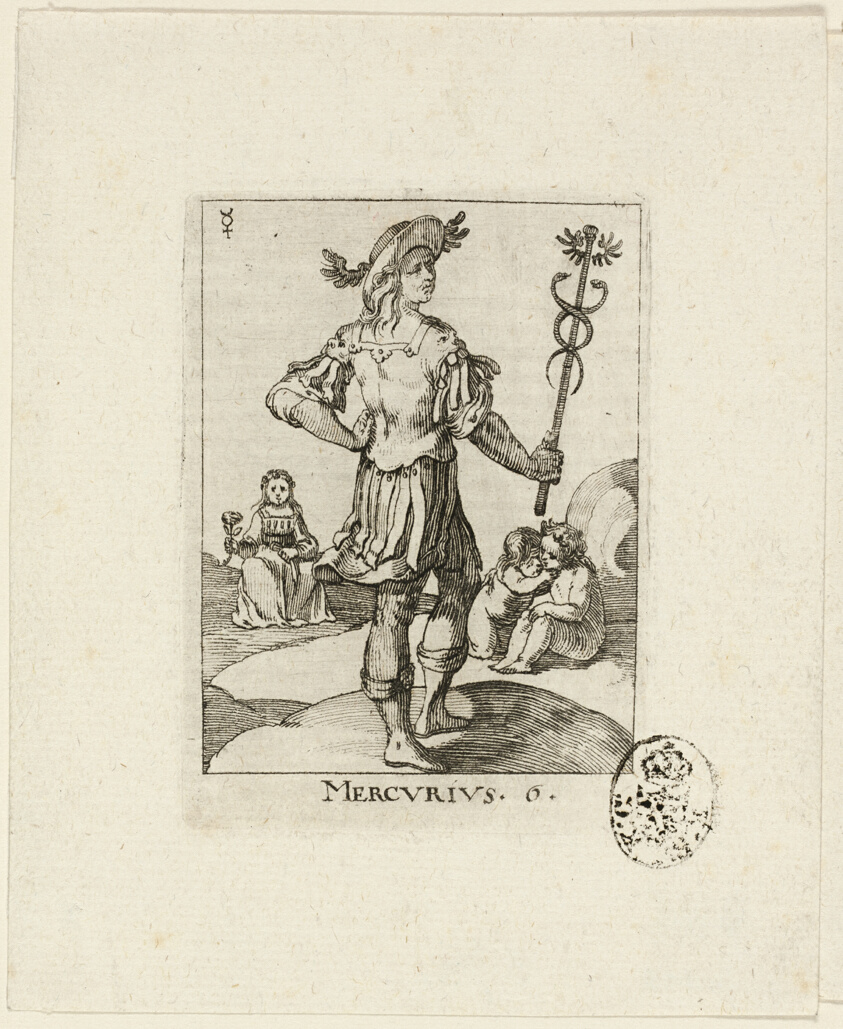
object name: Print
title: Mercurius, plate six from Der VII Planeten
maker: Conrad Meyer (Swiss, 1618-1689)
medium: Etching in black on ivory laid paper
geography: Switzerland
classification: etching; prints and drawing; print